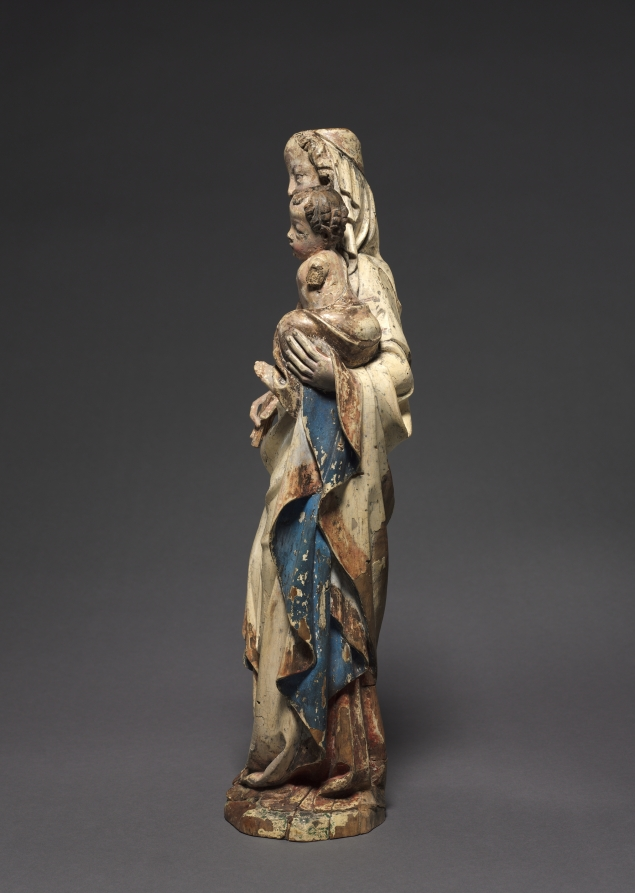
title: Virgin and Child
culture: Austria, Diocese of Passau, 14th century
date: c. 1370–1380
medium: painted lindenwood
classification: Sculpture